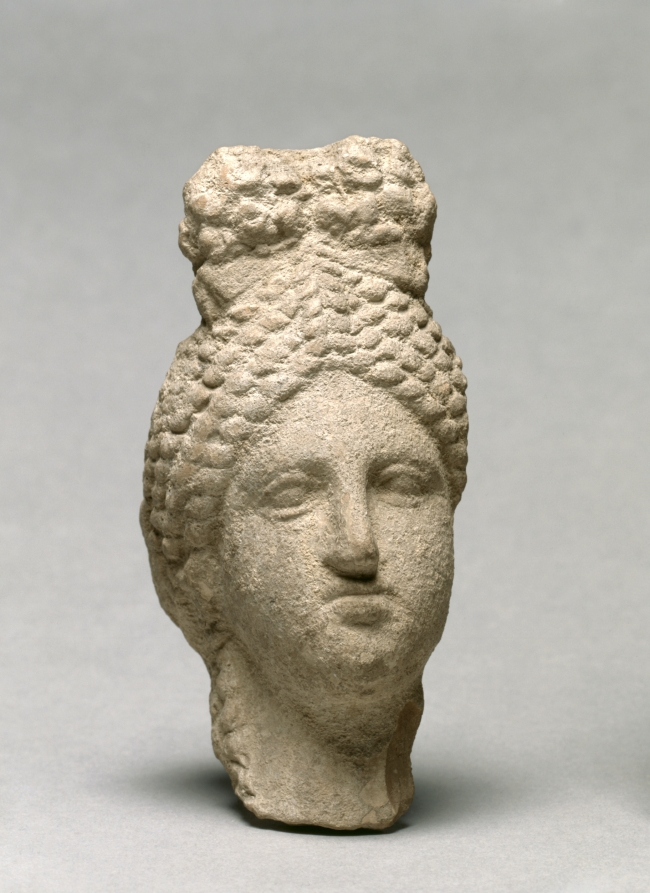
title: Woman's Head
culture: Greece, Sicily(?)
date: 300s BCE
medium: terracotta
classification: Sculpture